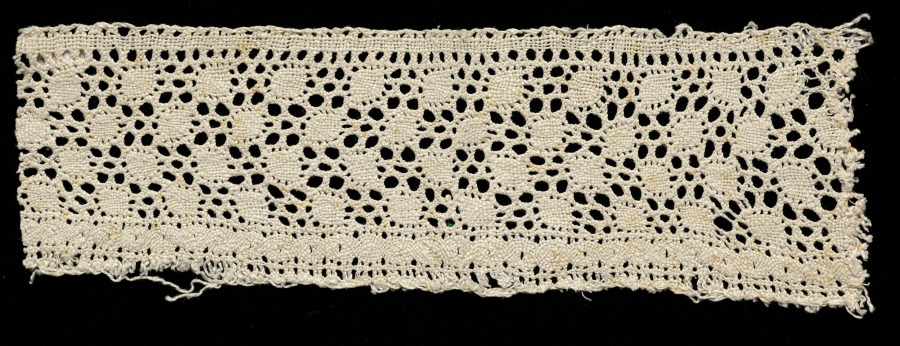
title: Lace Insertion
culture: Italy, Umbria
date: 1600s–1700s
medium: Bobbin lace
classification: Lace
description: The design motif of this piece of bobbin lace is referred to as 'piedi di gallina' (chicken's feet).